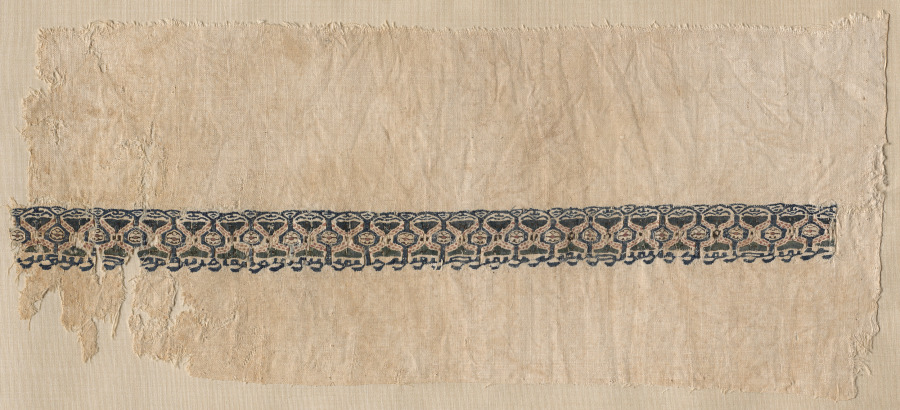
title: Fragment of a Tiraz-Style Textile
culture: Egypt, Fatimid period, Caliphate of al-Musta'li, AH 487-495 (A.D. 1094-1101)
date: 1094 – 1101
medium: tabby ground with inwoven tapestry ornament; linen and silk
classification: Textile